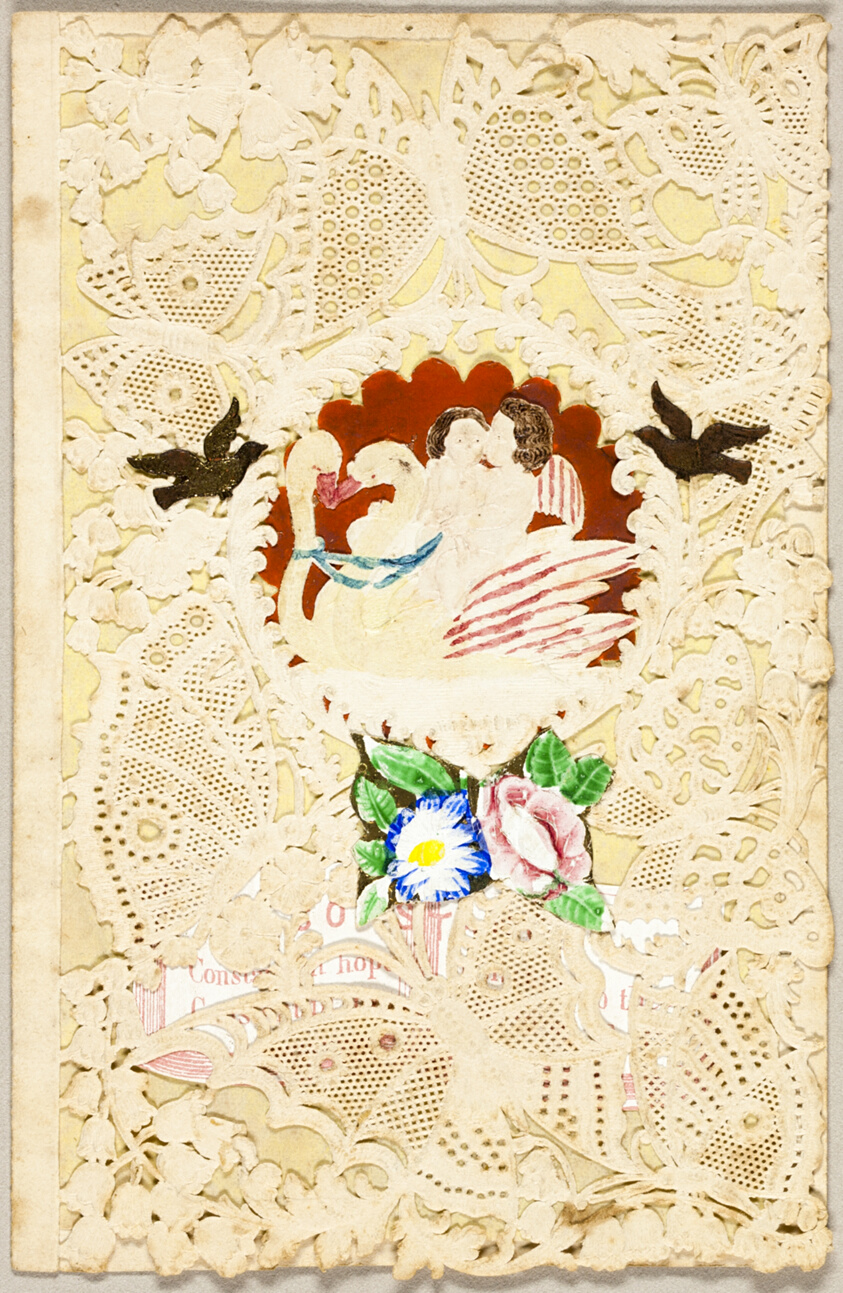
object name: Drawing and Watercolor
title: Untitled Valentine (Children, Swans, and Butterflies)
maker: John Windsor (English, 19th century)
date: 1860/69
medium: Collaged elements and watercolor on cut and embossed (designed) ivory wove paper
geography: England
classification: collage; valentine; prints and drawing; paper